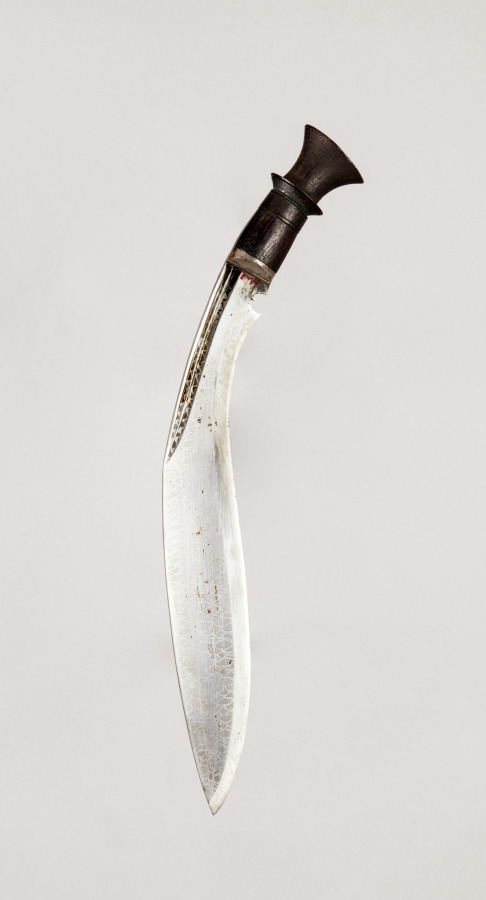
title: Knife (Kukri)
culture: Nepal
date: c. 1750–1800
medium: steel with etched surface and wooden handle, leather covered scabbard with brass mounts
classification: Arms and Armor